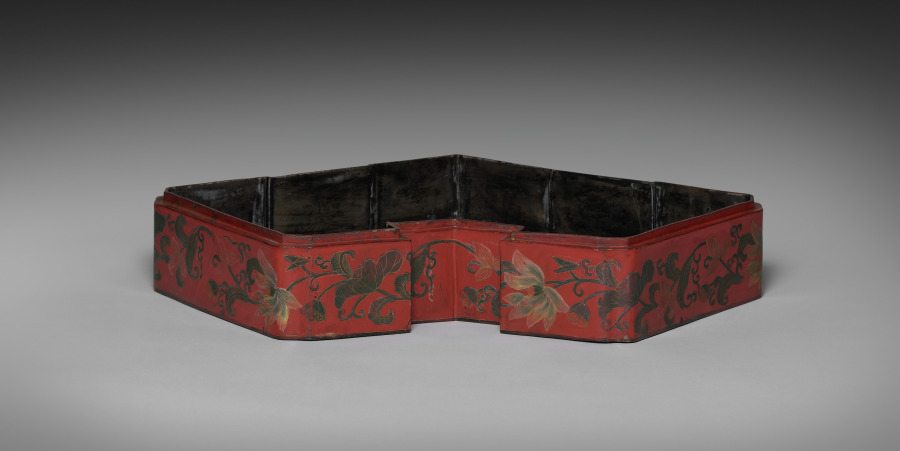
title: Lower Tier Box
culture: Japan, Edo period (1615–1868)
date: late 1700s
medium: red lacquer over a wood core, with litharge painting and engraved gold designs (Ryukyuan)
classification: Lacquer